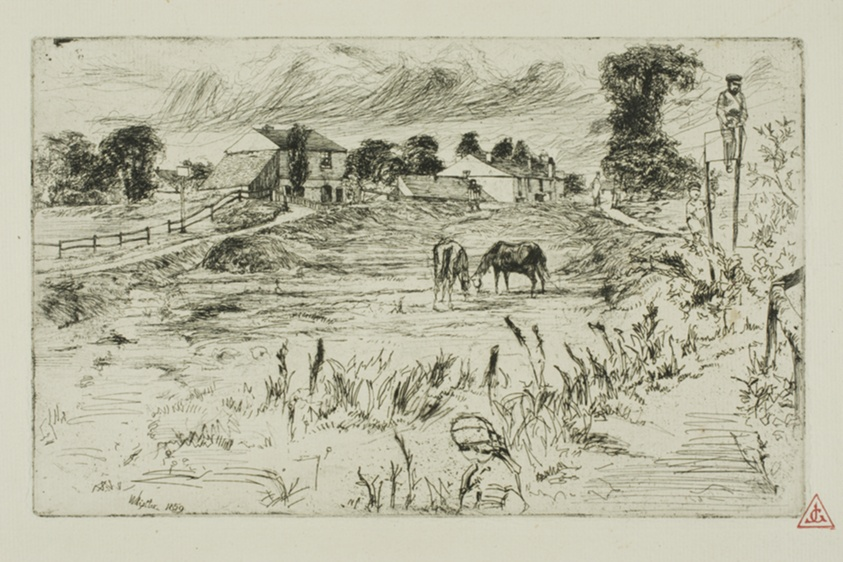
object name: Print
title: Landscape with Horses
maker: James McNeill Whistler (American, 1834-1903)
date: 1859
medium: Etching and drypoint with foul biting in black ink on cream laid paper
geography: United States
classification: etching; foul biting; drypoint; print; prints and drawing; paper